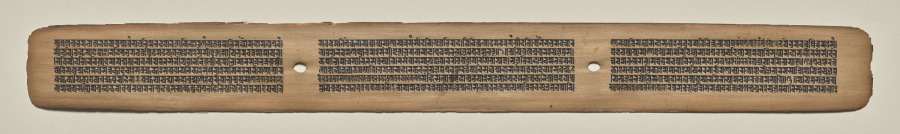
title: Text, folio 157 (recto), from a Manuscript of the Perfection of Wisdom in Eight Thousand Lines (Ashtasahasrika Prajnaparamita-sutra)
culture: Eastern India, Bihar, Vikramashila Monastery. Painting: Nepal, Kathmandu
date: Sunday, September 14, 1119 (year 239 of the Newar Samvat in the month of Ashvina)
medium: gum tempera and ink on palm leaves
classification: Painting